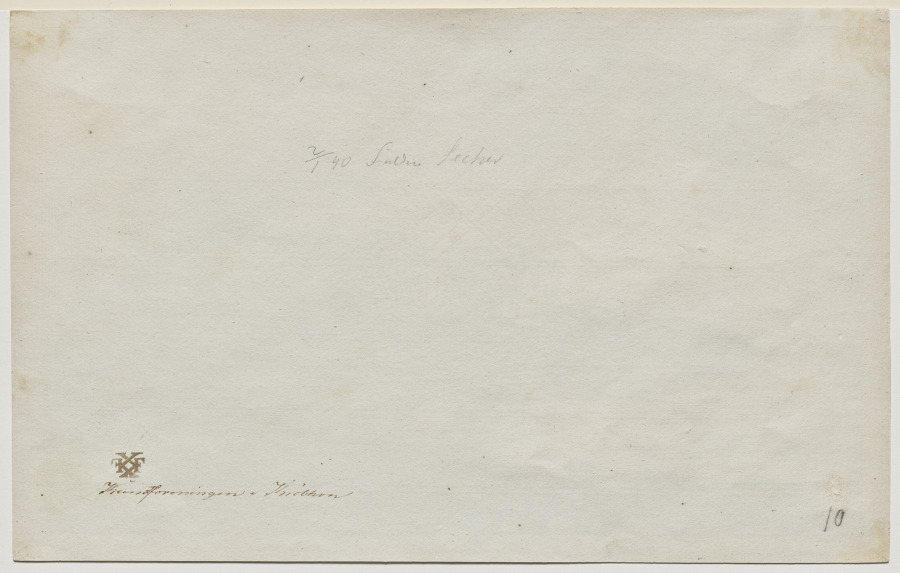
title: Asnæs Skov, Bay at Kalundborg Fjord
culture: Denmark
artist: Johan Thomas Lundbye (Danish, 1818–1848)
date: 1839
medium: Pen and black ink and gray and brown ink washes with arched framing line in pen and black ink, bordered in pink watercolor on modern cream laid paper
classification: Drawing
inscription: Inscribed and signed, black ink, lower left: Landskab ved Kallundborg Fjord. Asnæs Skov. Dec 1839. Johan Th Lundbye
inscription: inscribed, black ink, lower right: 2/1 1840 tilf. Fuldmagtig Secher i Kanders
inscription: Stamped, on verso, black ink, lower left: mark of Kunstforeningen (Lugt 988c)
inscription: inscribed, ink, lower left: Kunstforeningen København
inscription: inscribed, pencil, at center: 2/1 40 [illeg.] Secher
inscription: inscribed, pencil, lower right: 10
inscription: Watermark, at center: C&I HONIG / XX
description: Johan Thomas Lundbye belonged to the youngest generation of artists working during Denmark’s Golden Age, a period of unprecedented creative activity. This drawing depicts a wooded area on a narrow bay near the town where the artist grew up. Lundbye worked outdoors, directly from nature, aiming to create a work that conveyed his experience of nature. With exacting precision, he conveyed the scene’s solitude and featured a large dolmen, meant to allude to the region’s ancient past.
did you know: Copenhagen’s Kunstforeningen, an exhibition society for contemporary art, purchased this drawing from Lundbye shortly after its creation—a practice meant to extend the organization’s support of artists.